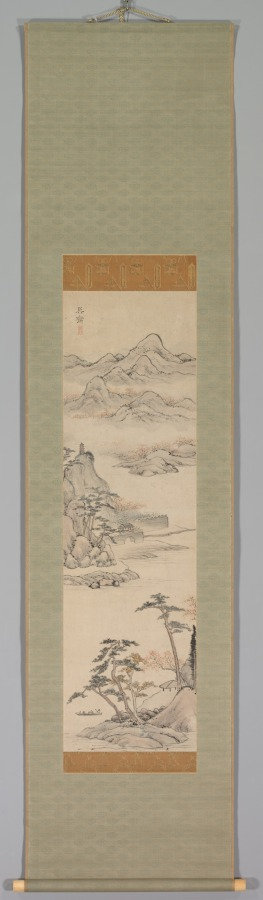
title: Landscape with Boaters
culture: Japan, Edo period (1615–1868)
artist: Kimura Kenkadō (Japanese, 1736–1802)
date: late 1700s–early 1800s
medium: hanging scroll; ink and slight color on paper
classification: Painting